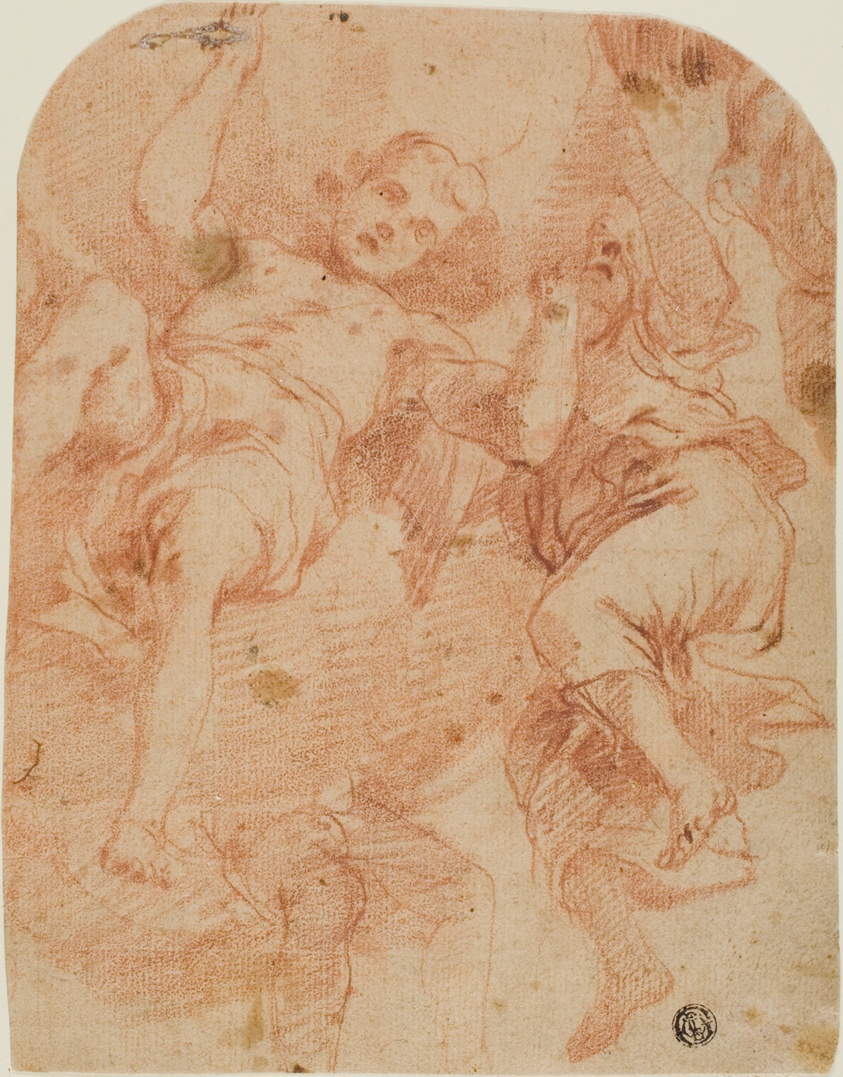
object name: Drawing and Watercolor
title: Study of Two Angels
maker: Mattia Preti (Italian, 1613-1699)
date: 1661/1666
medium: Red chalk on buff laid paper, laid down on cream laminate card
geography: Italy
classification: chalk; drawings (visual works); prints and drawing